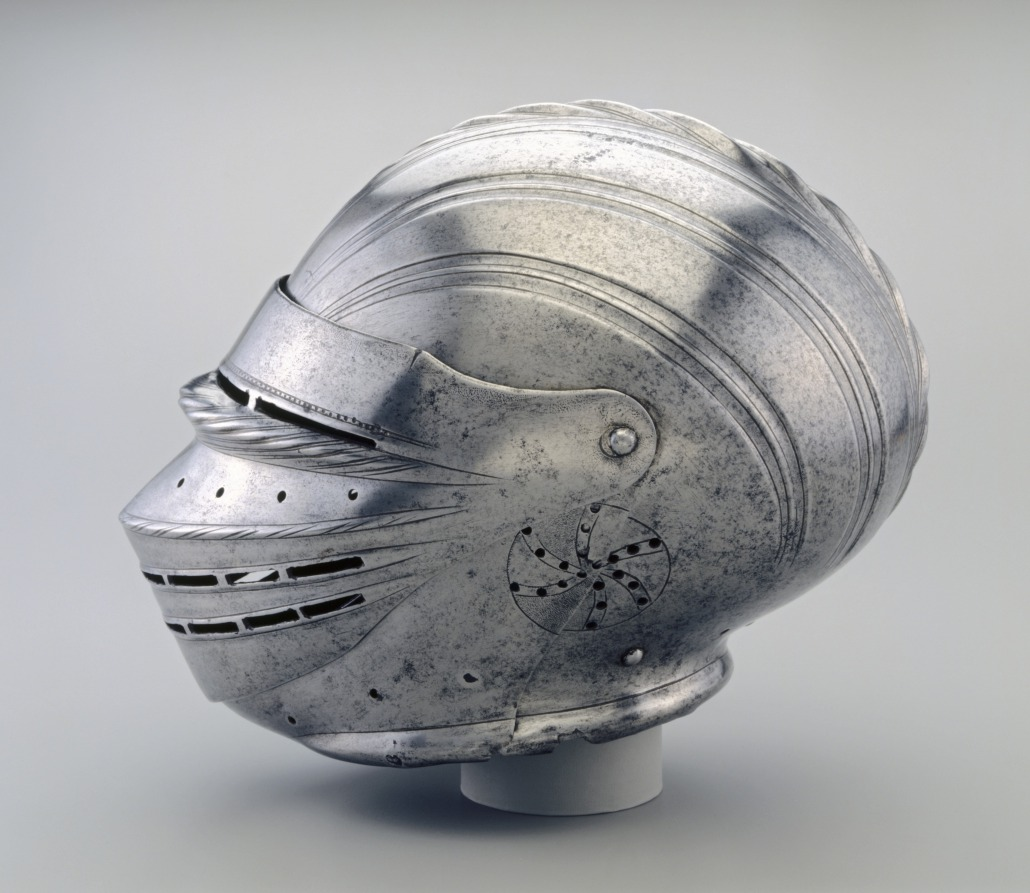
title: Field Armor in Maximilian Style: Helmet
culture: Germany, Augsburg(?), early 16th century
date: c. 1510–15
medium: fluted steel with leather straps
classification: Arms and Armor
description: Most of the elements of this armor were made together, forming a single suit. The lower legs contain some modern restorations. The helmet is believed to be the work of the esteemed Augsburg armorer, Lorenz Helmschmied, who was active at the Hapsburg, Mantua, and Urbino courts between 1467 and his death in 1515.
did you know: This armor was made to mimic the trend of pleated clothing that was popular at the time.